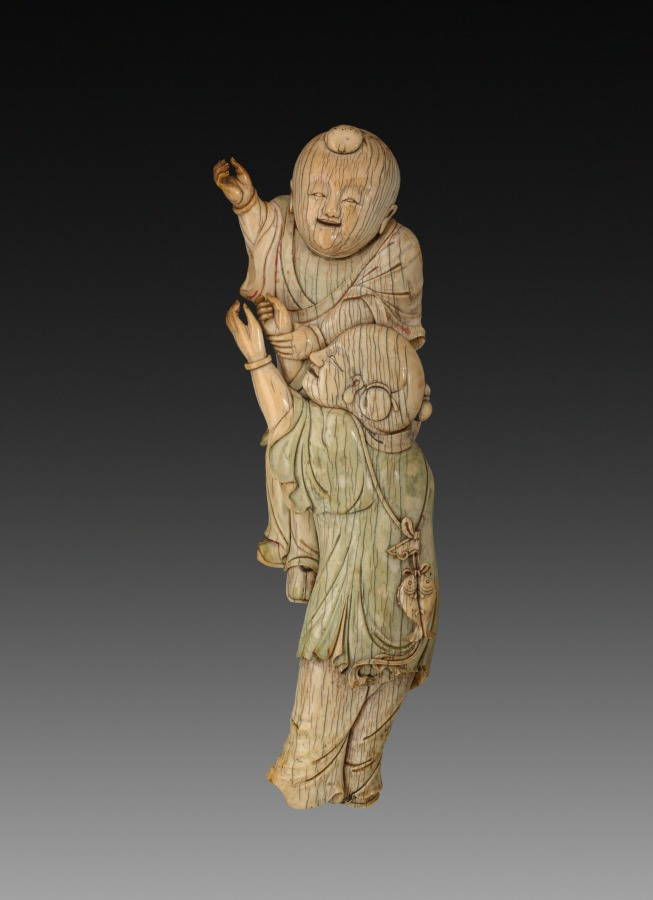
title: Wall Plaque with Two Boys Playing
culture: China, Qing dynasty (1644-1911)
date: 1700s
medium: ivory with traces of polychrome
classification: Ivory